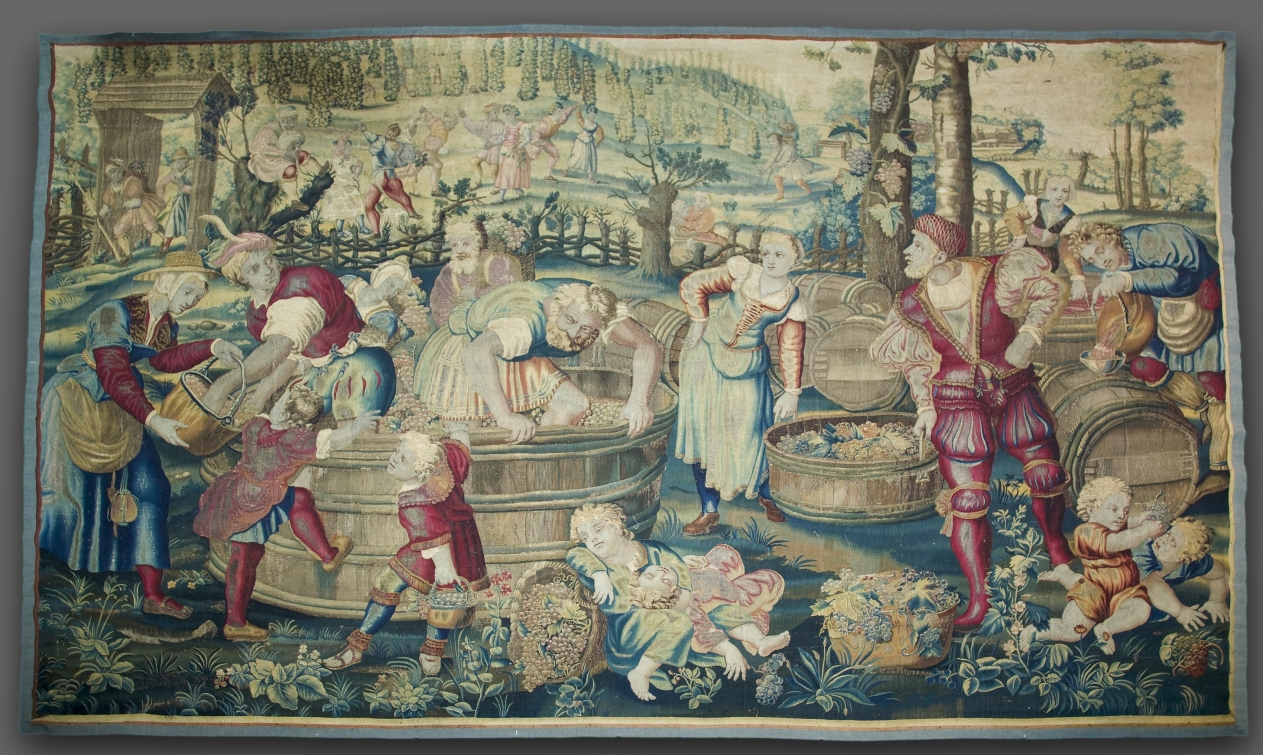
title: Autumn: Vintage Scene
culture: France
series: Four Seasons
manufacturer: possibly by Gobelins Manufactory (France, Paris, est. 1662)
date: designed c. 1535, woven mid- to late 1600s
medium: Wool, silk, and gold filé: tapestry weave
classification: Tapestry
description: In 16th-century Europe, the grape harvest took place in autumn, a tradition that persists among vintners to this day. Here, men and women gather grapes in buckets and drop them into an enormous wood vat. Two men stomp on the ripe grapes, squeezing out the juice. A man on the far right pours the juice into barrels, where it will ferment into wine. Children sleep or play in the foreground; one mischievous toddler presses grape juice into the mouth of another small child. In the distance four couples dance to music provided by a bagpiper, who is perched in a tree.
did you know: Originally green, the plants were woven using yarn first dyed blue and then dyed yellow; over time the yellow dye has faded so that today the plants appear blue.